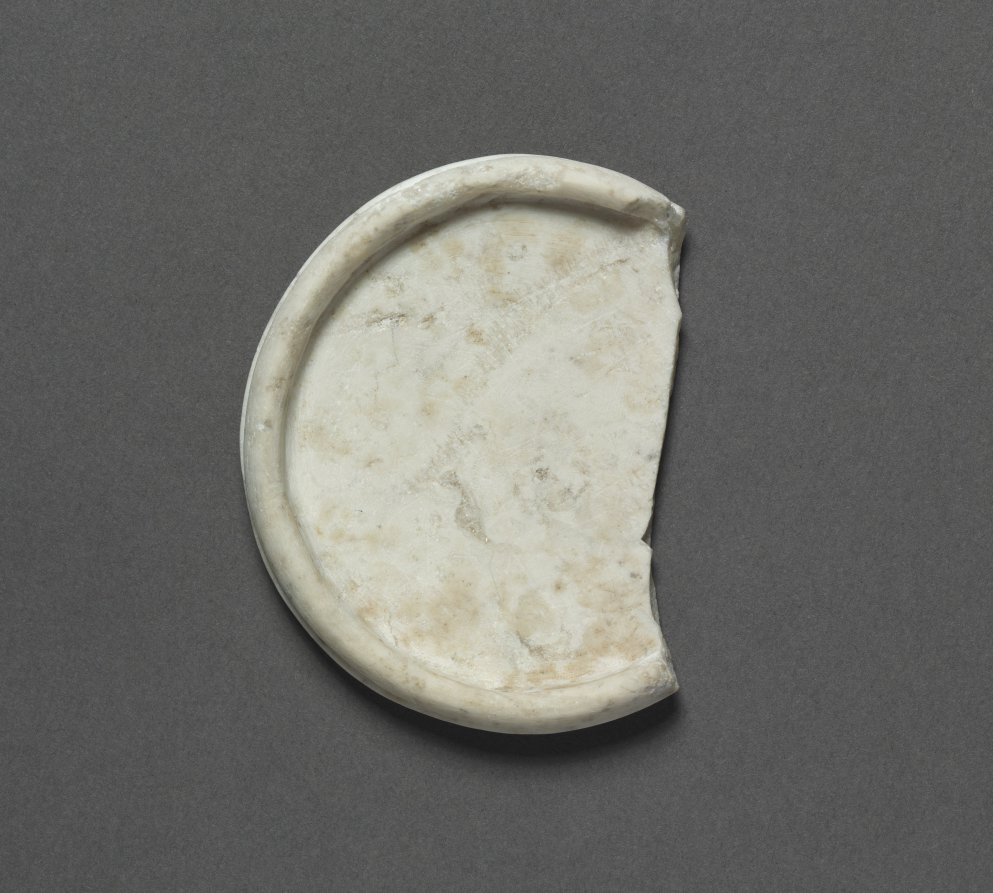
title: Cosmetic Vessel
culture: Egypt, Saqqara, north of the Step Pyramid, tomb 2331, excavations of J. E. Quibell, 1910-1911, Predynastic, Dynasty 2-3, 2770-2573 BC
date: 2770–2573 BCE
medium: limestone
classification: Vessels